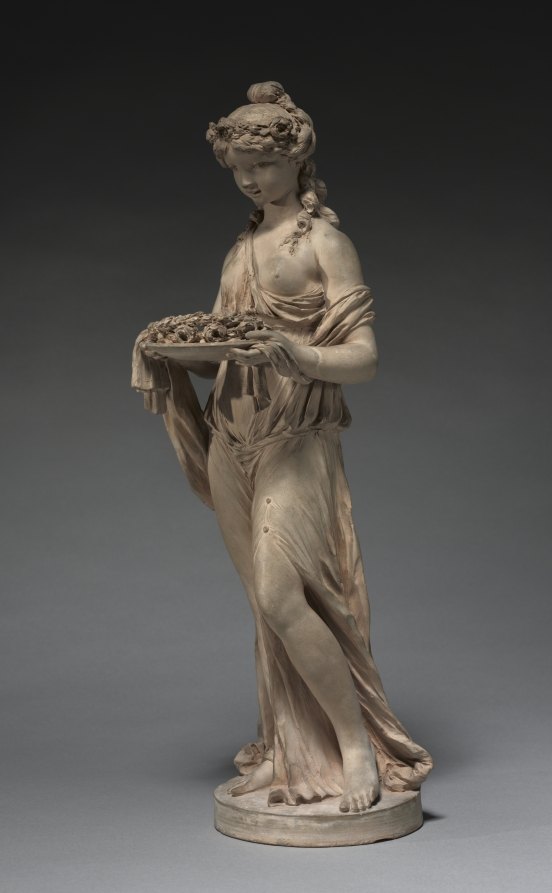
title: Young Girl Carrying a Garland of Roses on a Platter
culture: France, 18th century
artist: Clodion (French, 1738–1814)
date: early 1770s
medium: terracotta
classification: Sculpture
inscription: signed near base: CLODION.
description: Claude Michel, generally referred to as Clodion, is best known for his decorative terra-cotta statuettes. This work is quite representative of Clodion in both subject and style. The sculpture, which is developed upon works dating from the artist's earlier residency in Rome, represents a standing female figure carrying an abundant display of flora. The figure alludes to Greek and Roman depictions of the horae, or goddesses of the seasons, and, through the figure's floral crown and platter, can easily be attributed to the season of spring.